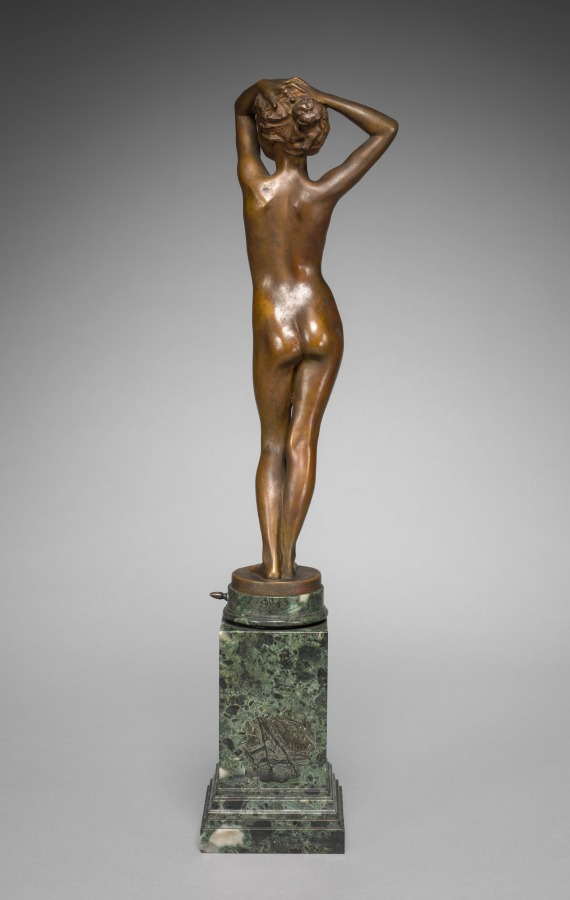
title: Eva, Study of a Nude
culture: America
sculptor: Emil Fuchs (American, born Austria, 1866–1929)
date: 1913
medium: bronze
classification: Sculpture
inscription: Signed on base: EMIL FUCHS 1913